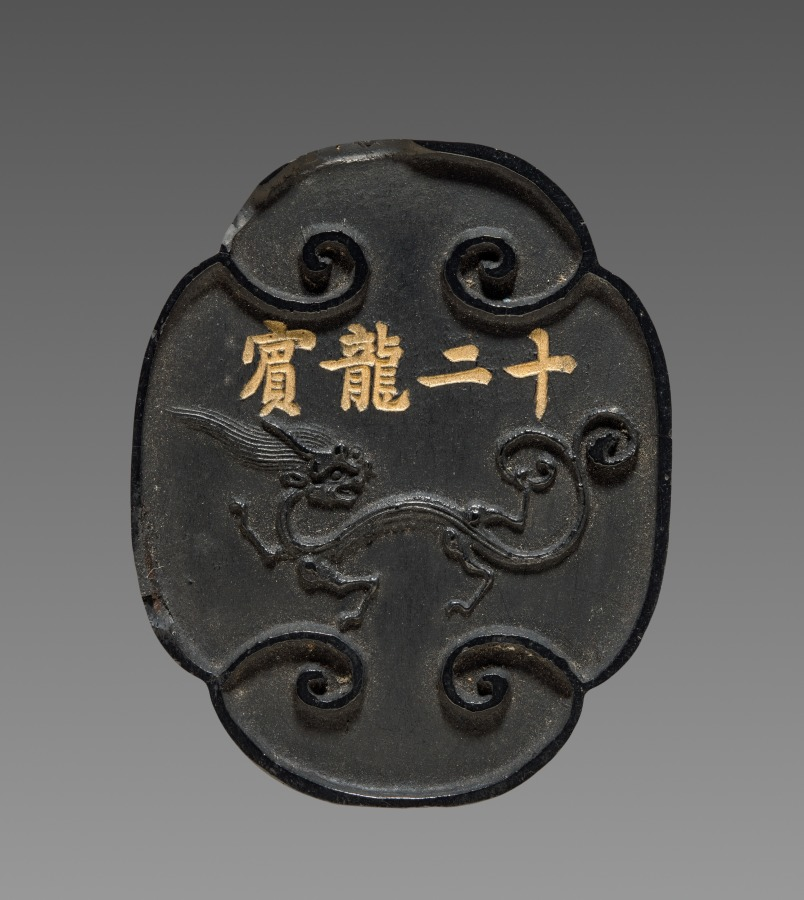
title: Ink Cake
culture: China, Qing dynasty (1644-1911)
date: 19th Century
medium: ink cake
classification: Miscellaneous